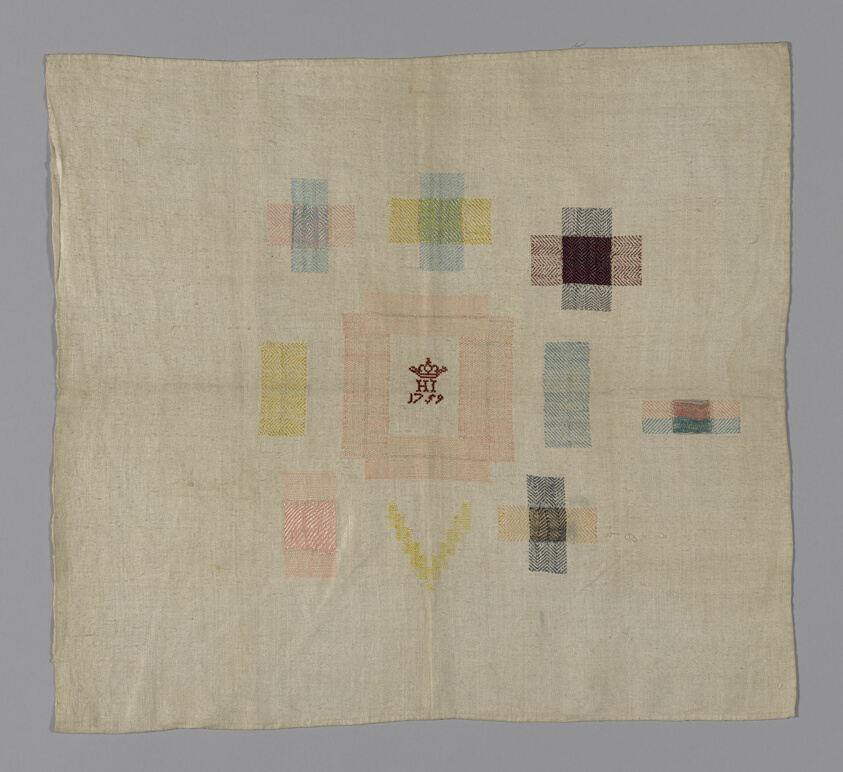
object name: Textile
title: Darning Sampler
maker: England, Germany, or Netherlands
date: 1759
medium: Linen, plain weave; embroidered with silk in darning and cross stitches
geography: England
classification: textile; needlework (visual works); sampler